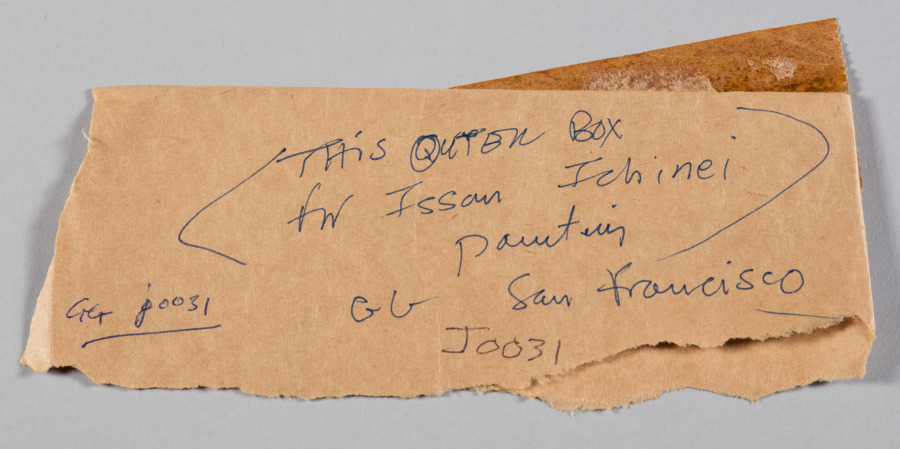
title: Reeds and Geese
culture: Japan, Kamakura period (1185–1333)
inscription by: Yishan Yining [Issan Ichinei] (Chinese, 1247–1317)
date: 1314–17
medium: hanging scroll; ink on paper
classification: Painting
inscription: signed: Issan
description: Reeds and geese has been a common pairing in Chinese literary and visual culture for many centuries. This painting presents the contribution of a Japanese amateur painter, almost certainly a Zen Buddhist monk, to Japan’s fledgling efforts to add the theme to its own cultural vocabulary in the early 1300s. As was customary at the time in Japan, the painter did not sign or seal his work; the inscription, a poem added to the painting by the eminent émigré monk Yishan Yining, along with his signature and seal, was of far greater cultural value. Today, the modestly sized painting has tremendous significance as one of the earliest surviving examples of Japanese ink paintings with reeds and geese.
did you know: Tokyo National Museum owns a copy of this painting made by Kano Gyokusen (1796–1864) when he was 14 years old.